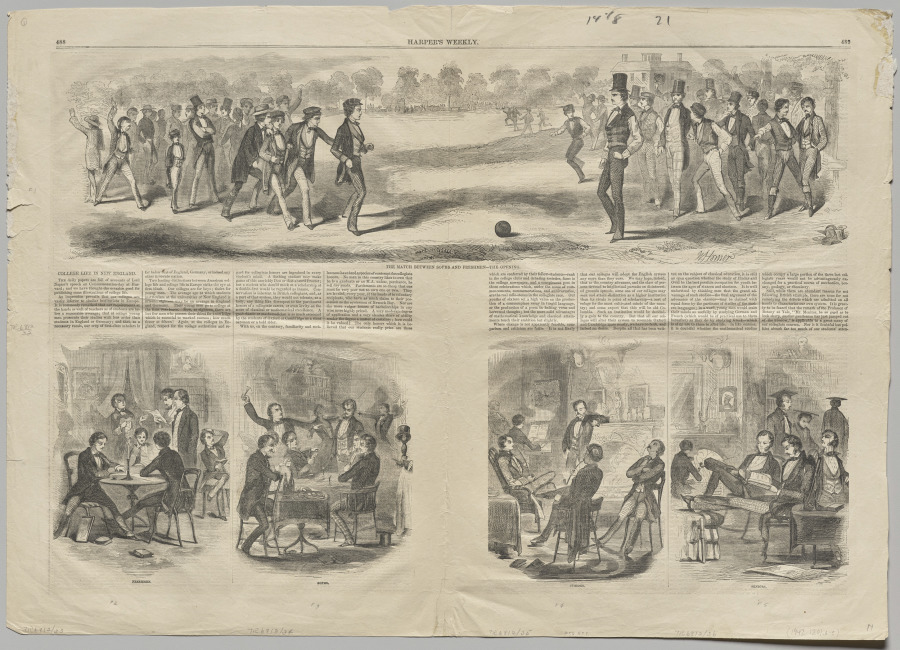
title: The Match between the Sophs and Freshmen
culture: America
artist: Winslow Homer (American, 1836–1910)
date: 1857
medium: wood engraving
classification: Print